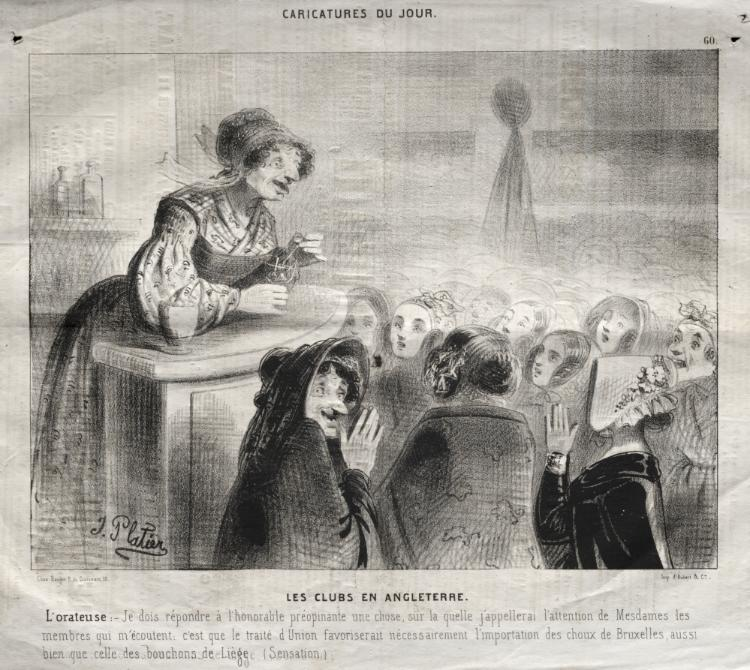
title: Les Clubs en engleterre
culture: France, 19th century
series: Caricatures du Jours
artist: Jules Platier (French)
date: c. 1842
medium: lithograph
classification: Print